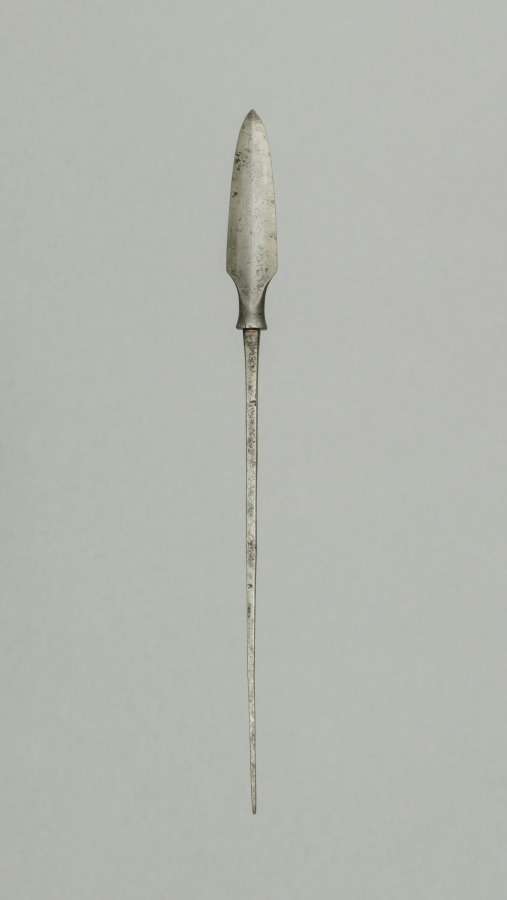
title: Arrow Point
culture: Japan, Edo period (1615–1868)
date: 1700s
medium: steel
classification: Arms and Armor